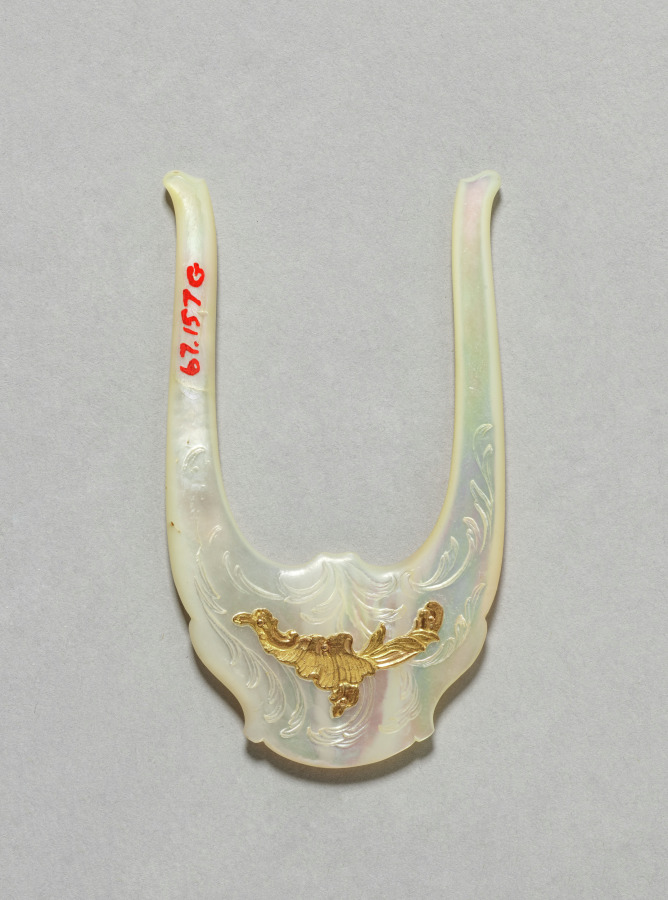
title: Lucet from a Sewing Box (Nécessaire)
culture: Austria, possibly Vienna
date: c. 1765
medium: gold and mother-of-pearl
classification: Miscellaneous